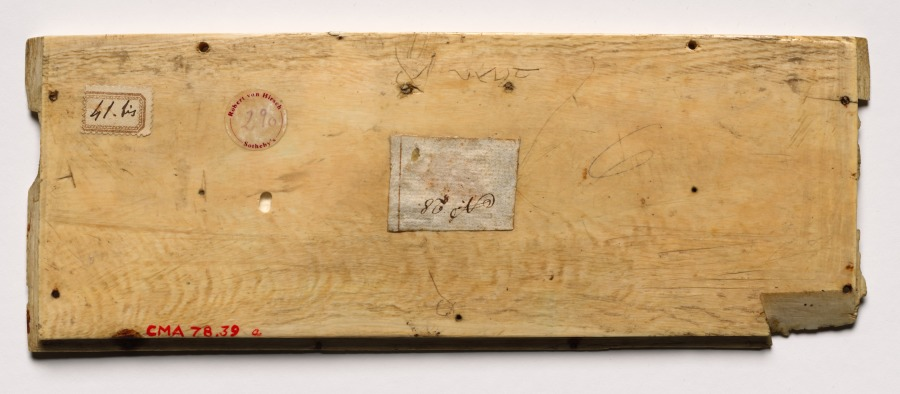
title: Panel from a Casket with Scenes from Courtly Romances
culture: France, Lorraine?, Gothic period, 14th century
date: 1330–1350 or later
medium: ivory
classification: Ivory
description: Among the most lavish and deluxe products of French ivory workshops of the 1300s were large caskets carved with elaborate scenes drawn from courtly romances. The panel shown here comes from such a casket. This side panel depicts scenes such as the fountain of youth and the unicorn hunt. These images suggesting chivalry, fertility, virginity, youth, and an idealized courtly love likely derive from manuscripts including the Roman de la Rose and the poems of Chrétien de Troyes. Such texts were often found within the libraries of the aristocracy, so the casket’s symbolic images would have been readily understood. Such caskets may have originally been gifts between a man and a woman. The expense of the material, ivory, suggests they were produced for an elite, aristocratic clientele.